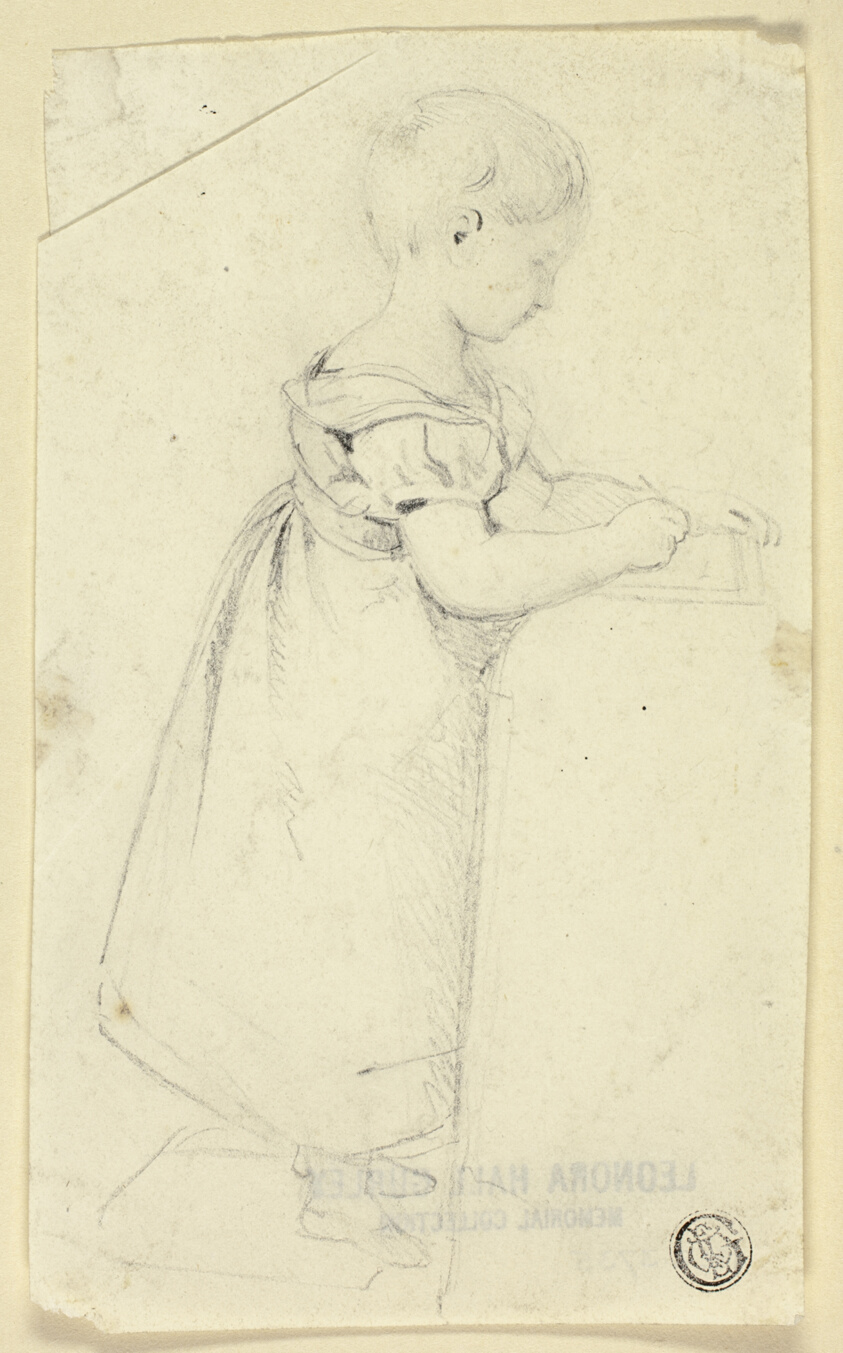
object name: Drawing and Watercolor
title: Little Girl Standing at Desk and Writing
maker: Edmund Thomas Parris (English, 1793-1873)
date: c. 1827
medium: Graphite on cream wove paper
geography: England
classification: graphite; drawings (visual works); prints and drawing